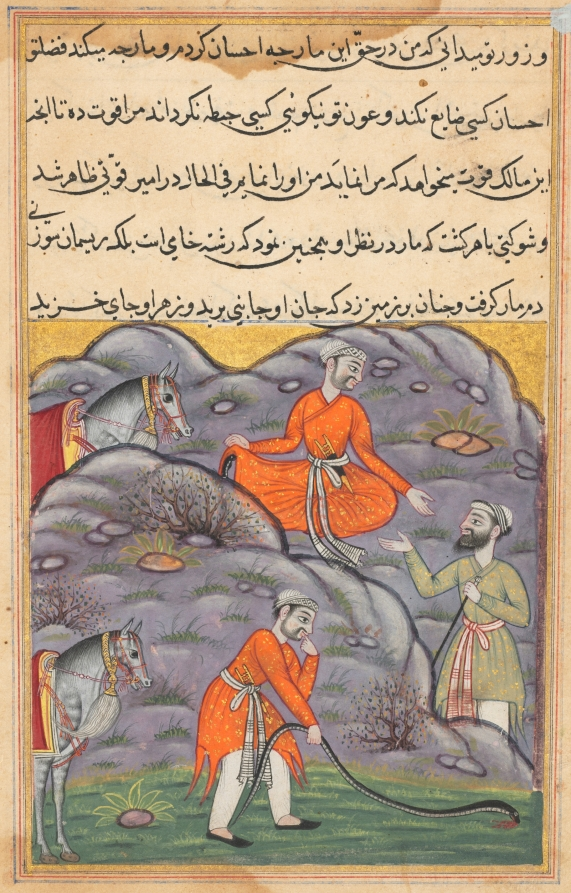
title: The emir slays the snake after giving it shelter, from a Tuti-nama (Tales of a Parrot): Forty-fifth Night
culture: Mughal India, court of Akbar (reigned 1556–1605)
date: c. 1560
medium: gum tempera, ink, and gold on paper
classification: Painting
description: In the upper register, the emir addresses the snake’s owner. The snake itself hides, barely visible beneath the edge of the emir’s orange robe. In the bottom scene, the emir dashes the snake on the ground having realized that the dangerous animal planned to kill him.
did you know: The previous folio, showing Khujasta addressing Tuti the parrot, is currently in the collection of the National Museum of Asian Art-Freer Gallery of Art, Smithsonian Institution in Washington, DC.